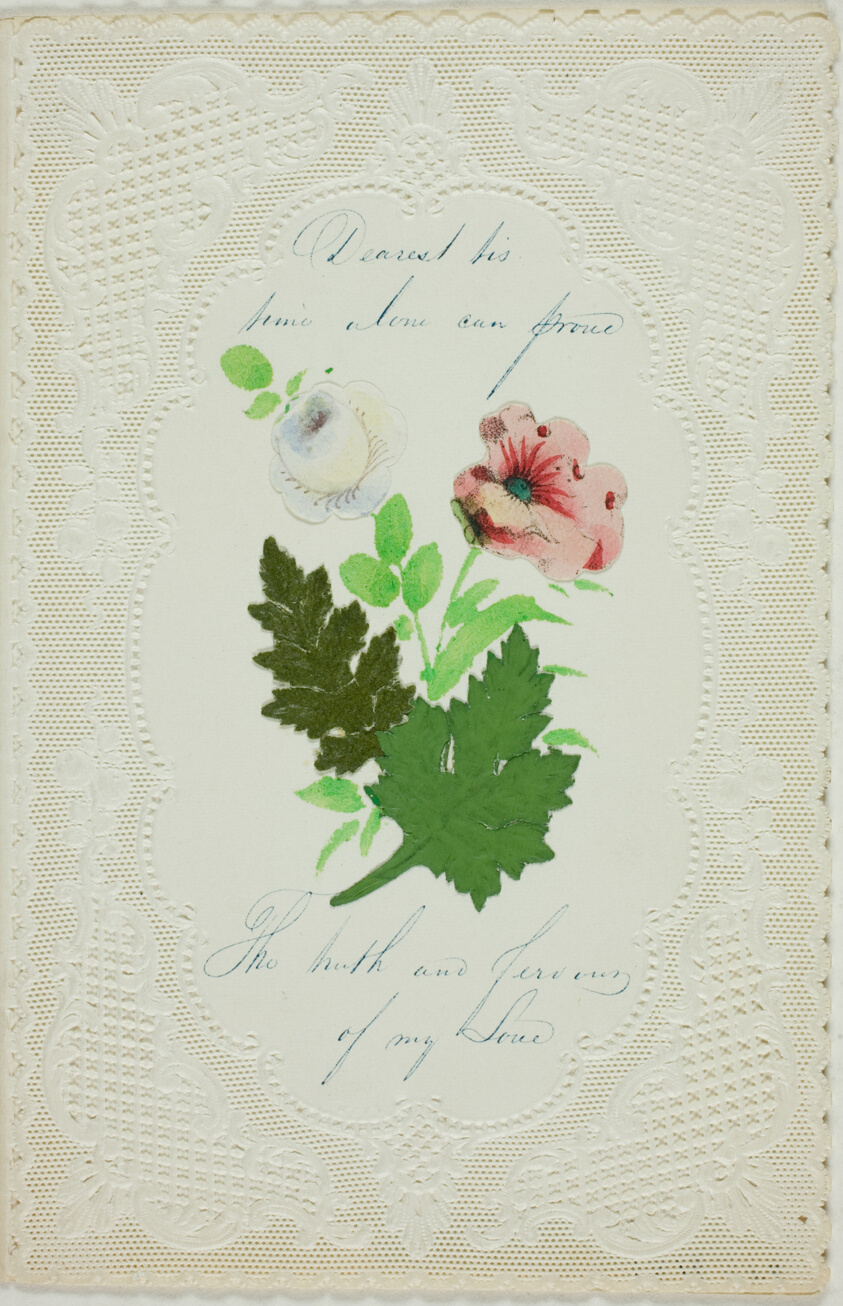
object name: Drawing and Watercolor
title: Dearest 'Tis Time Alone (valentine)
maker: George Meek (English, 19th century)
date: c. 1840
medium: Collaged elements and watercolor, with pen and blue ink on cut and embossed ivory wove paper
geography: England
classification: valentine; prints and drawing; paper